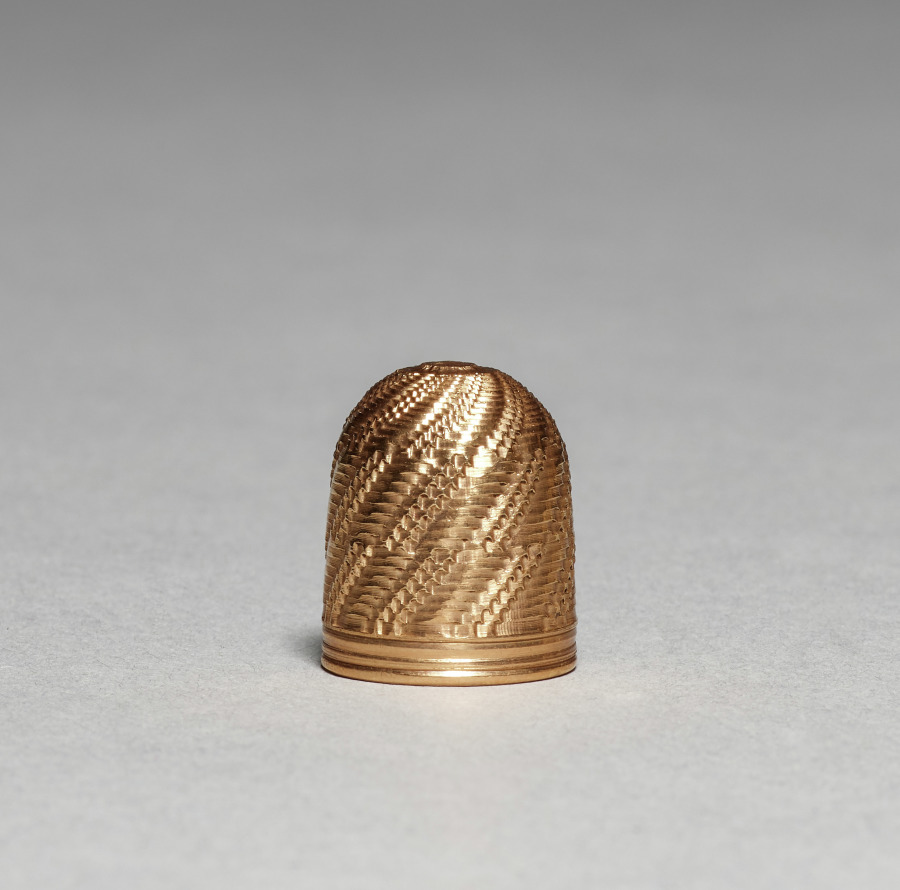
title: Thimble from a Sewing Box (Nécessaire)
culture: Austria, possibly Vienna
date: c. 1765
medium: gold and mother-of-pearl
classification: Miscellaneous